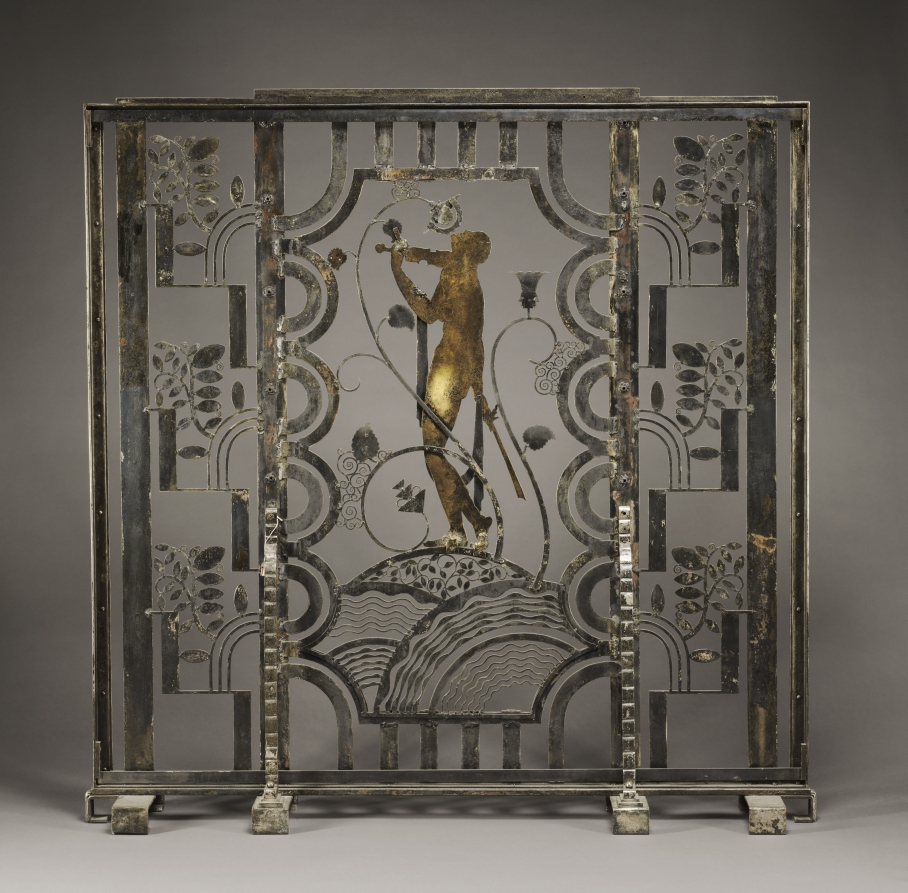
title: Muse with Violin Screen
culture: America, Ohio, Cleveland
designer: Paul Fehér (American, born Hungary, 1898–1990)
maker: Rose Iron Works (America, Ohio, Cleveland, est. 1904)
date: 1930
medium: Steel, brass; silver and gold plating, cotton velveteen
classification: Metalwork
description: Since the early years of the 20th century, the Rose Iron Works, a Cleveland supplier of architectural ornament, has produced distinguished metalwork. The company’s founder, Martin Rose, was born in Austria-Hungary and studied ornamental metalsmithing in Vienna prior to immigrating to Cleveland in 1902. In the 1920s, he hired a talented young Parisian designer, Paul Fehér, to work for the firm. Fehér’s designs, culminating in this massive screen, brought a modern European sensibility to the Rose Iron Works production. With its geometric patterning, highly stylized and abstracted natural forms, and the central figure reminiscent of the celebrated jazz singer Josephine Baker, this screen reflects the classic motifs of Art Deco design.